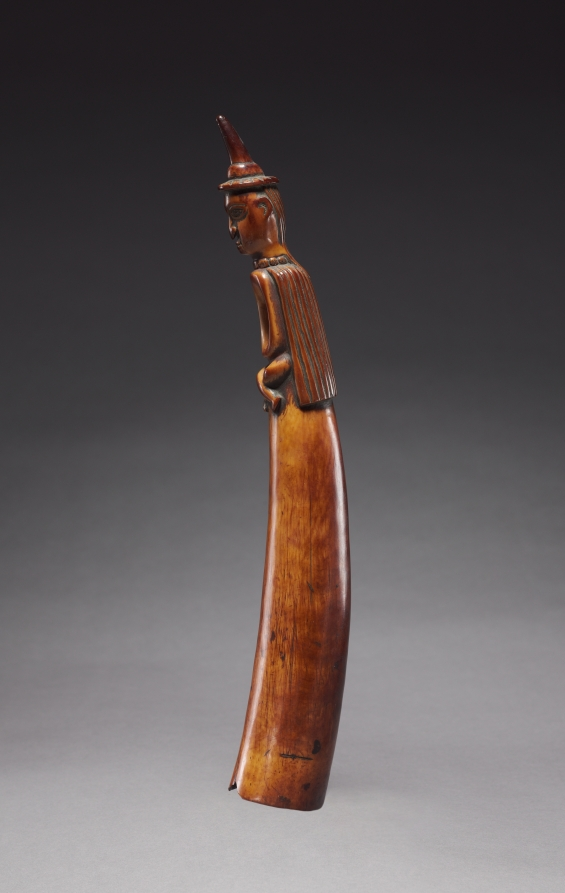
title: Oliphant (Side-Blown Trumpet)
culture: Africa, Central Africa, Democratic Republic of Congo (most likely), Cabinda, or Republic of the Congo, probably Yombe-style maker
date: late 1800s–early 1900s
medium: Ivory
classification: Musical Instrument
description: Side-blown trumpets were used on various occasions, and ivory examples seem to have been reserved for more solemn circumstances, such as funerals. As the mouthpiece is located on the inner curve, the person who played this instrument held it horizontally. A seated male Yombe ruler wearing a shell necklace and a European-style cloak and hat is carved on top. His blended dress shows how Yombe people (a Kongo sub-group) selectively adopted elements of foreign dress to wear with their own fashions.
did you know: Kongo Kingdom rulers sent ornately carved large side-blown trumpets to Europe as diplomatic gifts during the sixteenth century.